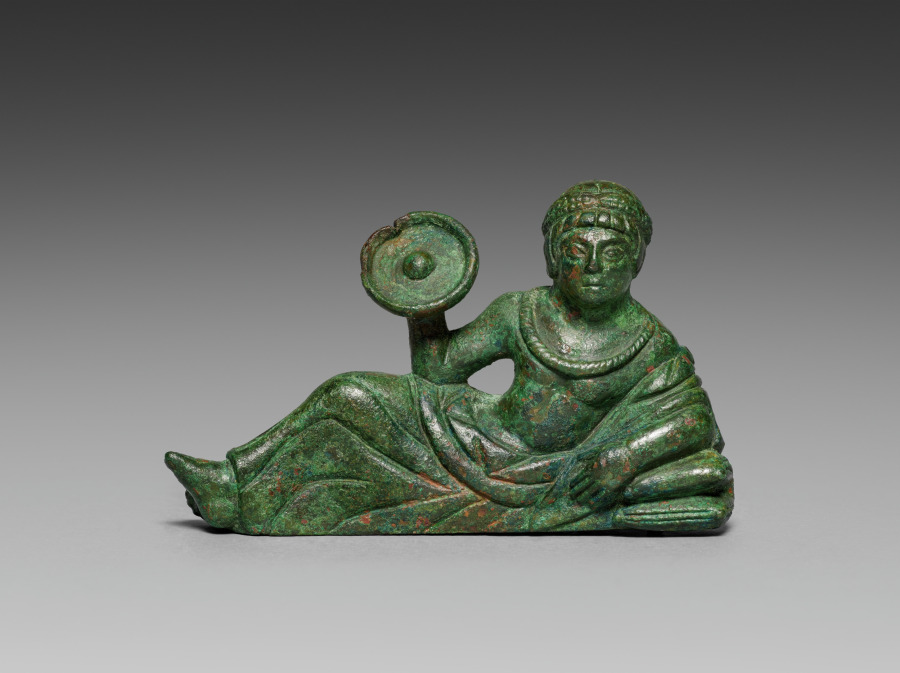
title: Vessel Ornament of Banqueter Holding an Omphalos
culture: Etruscan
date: probably 400–375 BCE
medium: bronze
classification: Sculpture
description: This bronze banqueter figurine was one of six once adorning the rim of a large basin, now lost. Cast in molds with individualized details, most have grooves on their underside to attach to the basin. Minute traces of gilding remain on areas of clothing and skin (mostly visible only under magnification), suggesting that they may have been completely gilded. Two handles in the form of hippocampi, horses with serpentine tails, also belonged to the basin and are now displayed at the Michael C. Carlos Museum at Emory University. The basin may have been used to hold liquid for a banquet, or was perhaps funerary. This bronze figurine holds a phiale mesomphalos, a shallow wine bowl, in his right hand. The vessel is tilted upward as if to spill its contents, perhaps as a libation for the gods. Traces of gilding remain in the corners of the phiale mesomphalos and the figurine’s drapery. His left hand rests against a fold of cloth slipping over his shoulder. A garland lies on his bare chest and another crowns his head. The banqueter shares many similarities with 1987.158.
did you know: Though primarily associated with dedicatory libations, the phiale mesomphalos could also be used for drinking.